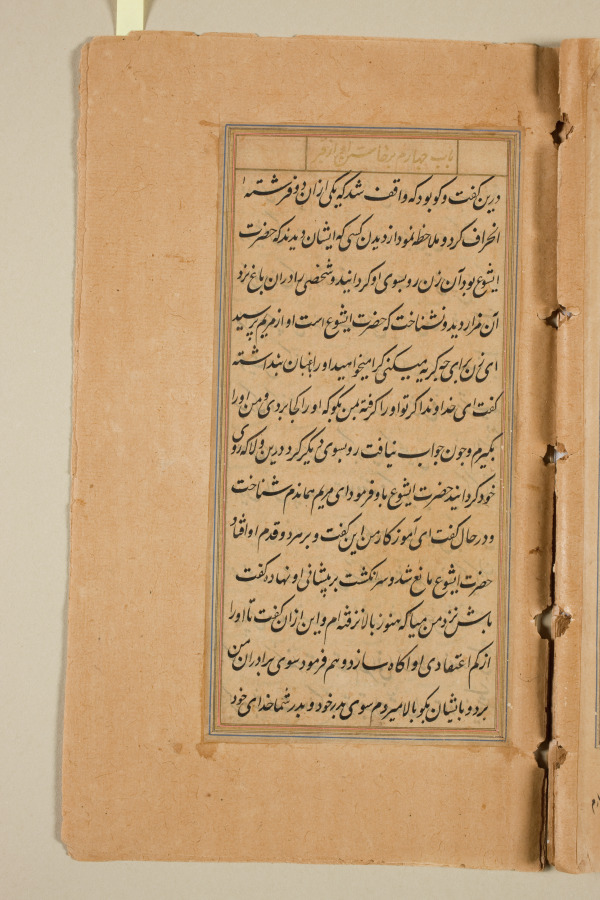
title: Text page from a Mirror of Holiness (Mir’at al-quds) of Father Jerome Xavier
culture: Mughal India, Allahabad, made for Prince Salim (1569–1627)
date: 1602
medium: Ink and gold on paper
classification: Manuscript